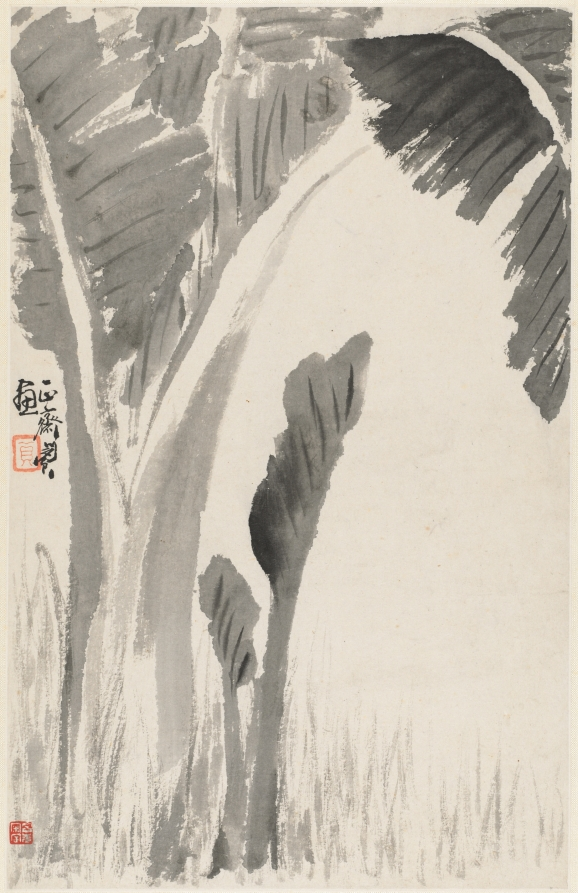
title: Banana Plants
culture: China, Qing dynasty (1644-1911)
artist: Min Zhen (Chinese, 1730–after 1788)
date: 1788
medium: album leaf, ink on paper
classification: Painting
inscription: Six seals appearing on the leaves: Min Zhen 閔貞; Zheng zhai 正齋; Qingqiao 青橋; Zhen 貞; Liao tang 蓼塘; Min Zhen zhi yin 閔貞之印。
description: Min Zhen was trained by Tang Yin (1682–1756), a writer, playwright, and superintendent of the imperial porcelain workshops in Jingdezhen. The connection to him may have enabled Min to stay in Beijing for a decade from around 1773. It is not clear whether he ever resided in Yangzhou, but his style is in many instances reminiscent of that of Yangzhou artist Huang Shen. This album was painted for his friend Dailili Shanren in exchange for a scholar’s stone. The paintings demonstrate the artist’s versatility and mature style in the last years of his life. While two paintings are rendered in unconventional compositions seen from above (Cat and Butterfly CMA 1985.71.5) and below (Banana Plant CMA 1985.71.11), they have a humorous touch. The banana plant stands for the world of literati but can also allude to Buddhism.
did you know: Min Zhen was orphaned at age 12 and developed an eccentric personality,